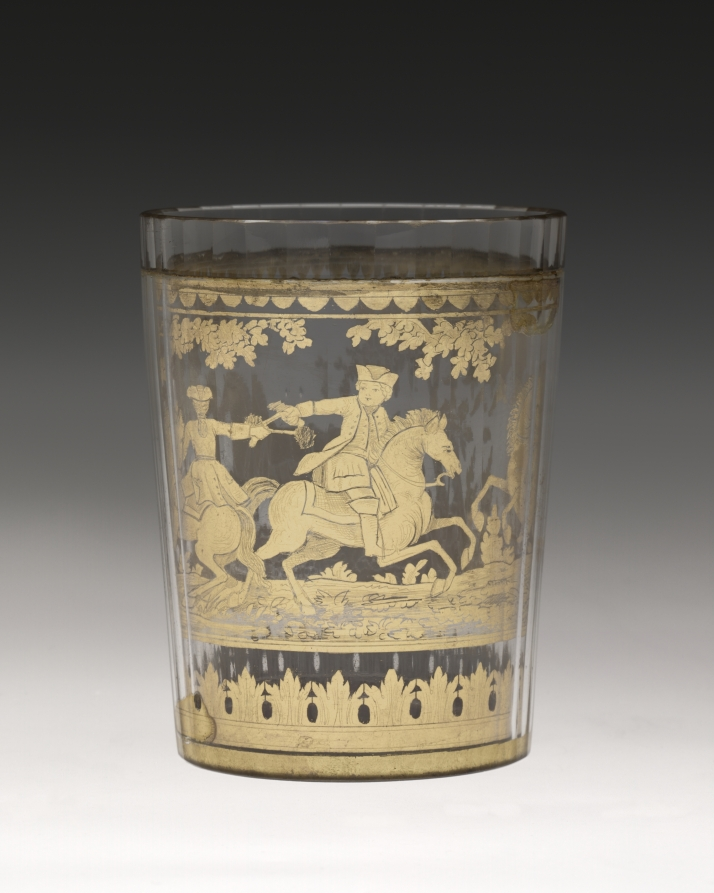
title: Tumbler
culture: Bohemia, 18th century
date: c. 1730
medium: zwischengoldglas (glass)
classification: Glass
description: Small beakers, or tumblers, were used to drink various types of spirits, cordials, and fortified wines, like sherry and port. “Gold between glass” (Zwischengoldglas) was a labor-intensive and costly technique practiced in Bohemia (present-day Czech Republic) and Austria in the 1700s. A gold-leaf design was affixed between two glass vessels that were then precisely fit together and fused. In this example, the gold leaf portrays a boisterous hunting scene. When the glass is tipped and emptied, the interior reveals that two hunting dogs have killed a hare.